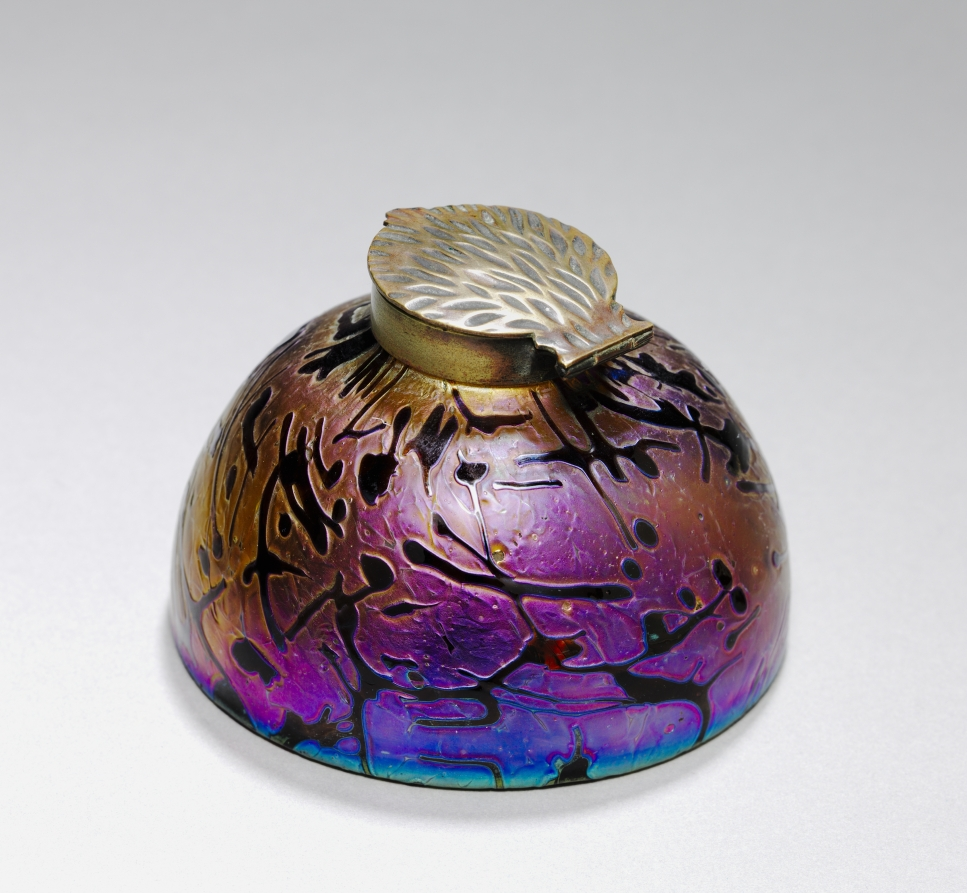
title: Inkwell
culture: Bohemia, 20th century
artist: attributed to Wilhelm Kralik Sohn (Bohemian)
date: c. 1900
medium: glass with bronze mount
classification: Glass